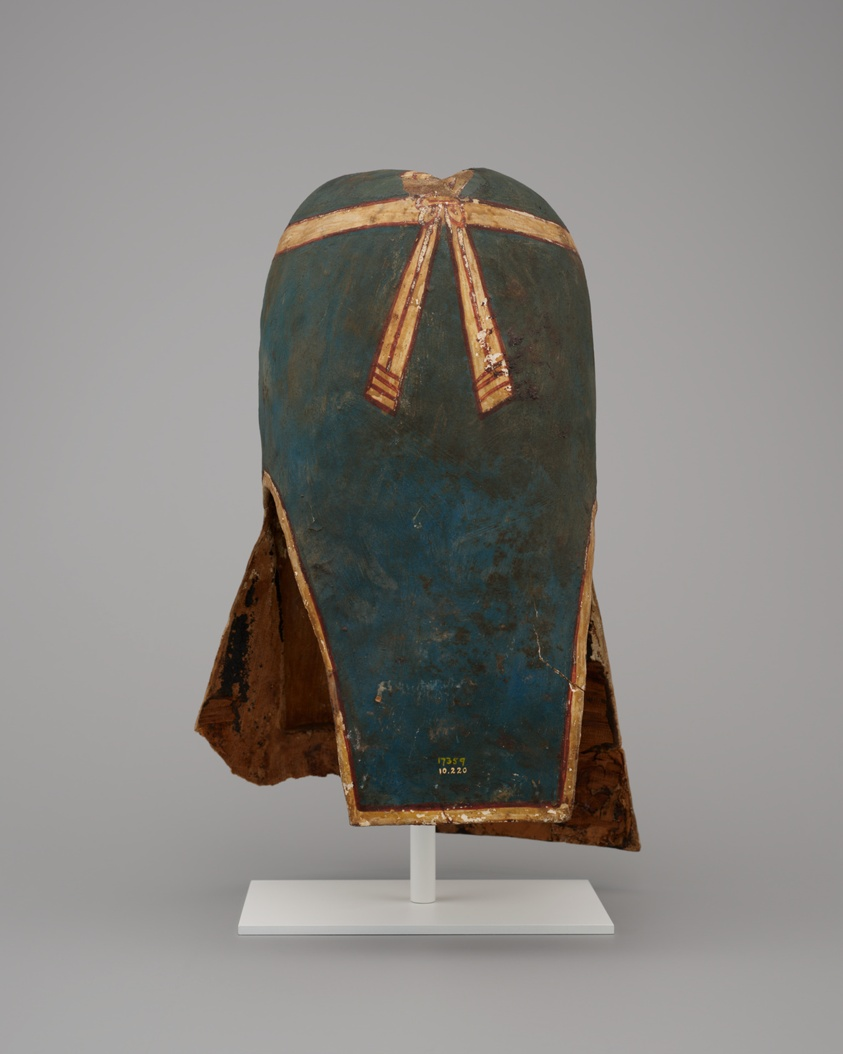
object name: Funerary Object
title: Funerary Mask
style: egyptian, ancient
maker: Egyptian; probably from Hawara, Egypt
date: Late Ptolemaic Period-early Roman Period, 1st century BCE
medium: Cartonnage, gold leaf, and pigment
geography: Egypt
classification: mummy goods; mummy masks; mummy portraits; ancient art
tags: masks